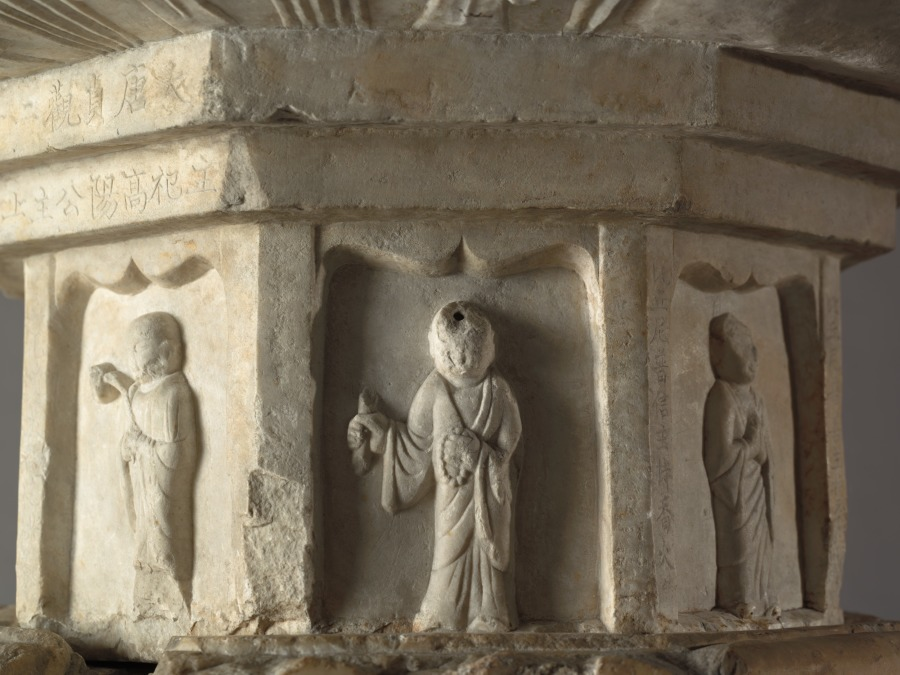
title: Fang Xuanling Pedestal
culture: China, Tang dynasty (618-907)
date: 647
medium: marble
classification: Sculpture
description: This double lotus pedestal exhibits the rich, ornate style of early Tang sculpture. It was commissioned by the Duke of Liang, Fang Xuanling (578–648), for the blessing of his second son and daughter-in-law, the Tang imperial princess of Gaoyang. The iconography and inscription suggest that it originally went with a statue, now missing, of Shakyamuni, the historical Buddha, instead of Amitayus. Today the pedestal is topped with Amitayus, the Buddha of Infinite Life, seated in meditation. Although the pedestal was not made with the statue, the combination is faithful to the original artistic conception.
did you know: In front, the top layer of the pedestal has an abstract curvilinear motif suggesting drapery; the rear is carved with a flower-and-leaf motif.